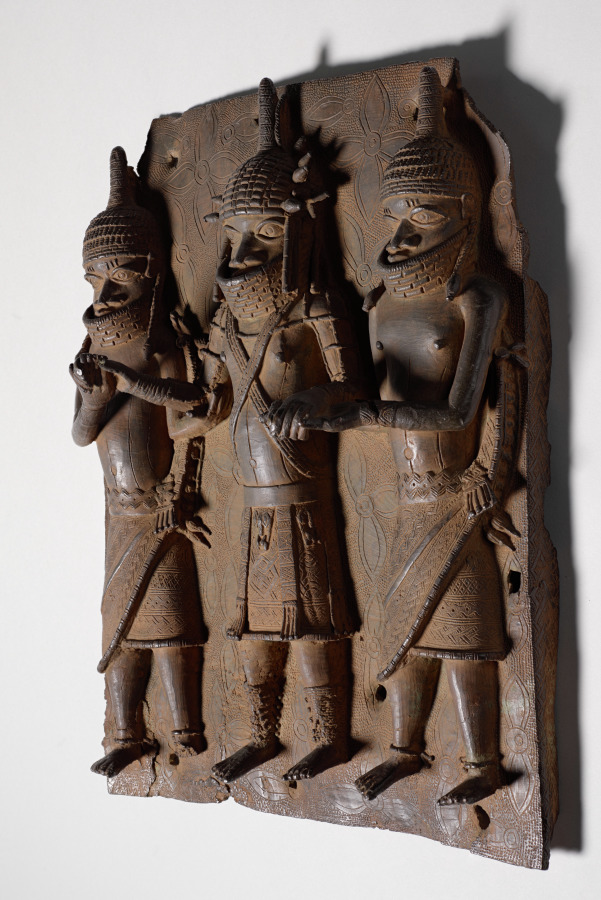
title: Plaque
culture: Nigeria, Benin Kingdom, Ẹdo peoples, members of the Igun Eronmwon (royal brasscasters) guild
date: 1500s–1600s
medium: Copper alloy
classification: Sculpture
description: Nearly 900 metal plaques once adorned the Ọba’s palace courtyard, documenting Benin’s history and customs. This one depicts two male attendants (enobore) supporting an Ọba. It uses hierarchical composition: important figures are large and centered. Everything about the Ọba is greater than his companions: their bodies, clothing, and jewelry. The flanking attendants physically support a man weighed down by heavy royal garments and responsibilities. Brasscasters skillfully cast their clasping hands projecting from the plaque. The bottom left number means the British Museum formerly owned this. It entered their collection in 1898, one year after British troops took it from a palace storeroom during the Siege of Benin.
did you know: Look at the side of this plaque. The designs on the slender edges are considered visual "signatures" of the different casters who made plaques for the Oba of Benin.